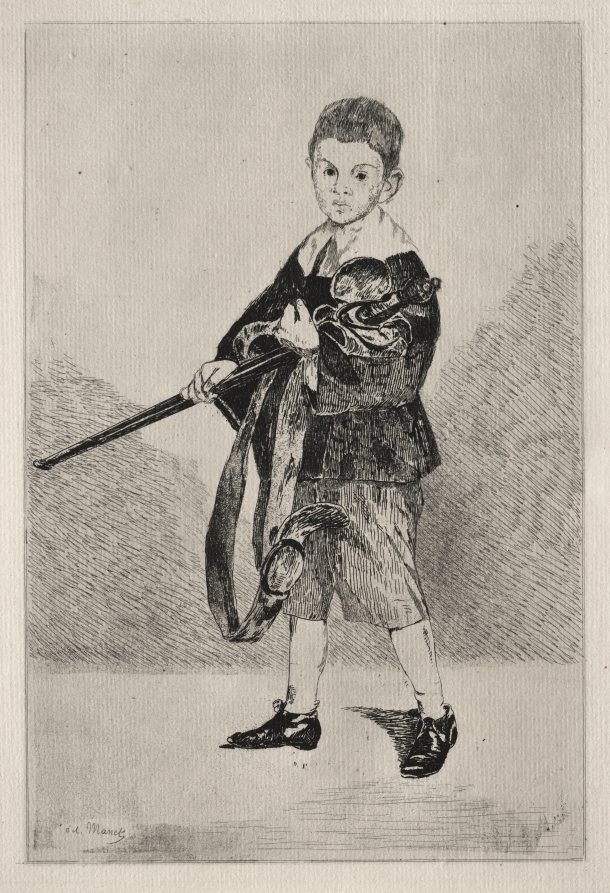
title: The Boy with a Sword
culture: France, 19th century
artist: Édouard Manet (French, 1832–1883)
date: 1861–62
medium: etching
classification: Print